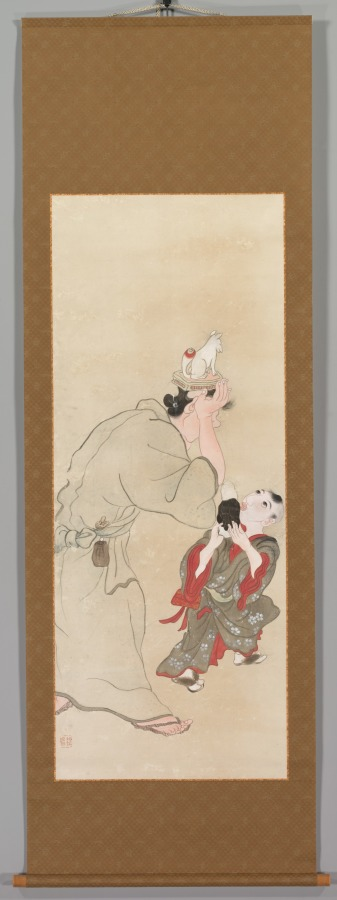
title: Genre Figures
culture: Japan, Edo period (1615–1868)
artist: Takebe Sōchō (Japanese, 1760–1814)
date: c. 1816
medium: hanging scroll; ink and color on paper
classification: Painting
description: Though rarely mentioned in official histories, Socho was an accomplished painter whose talent is readily apparent to the modern eye. For his compositions he chose traditional Japanese stories or everyday events. This painting belongs to a triptych (set of three) that was recently converted from folding screen panels to hanging scrolls.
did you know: The adult in this painting transports a small sculpted image of the fox deity Inari atop his head.